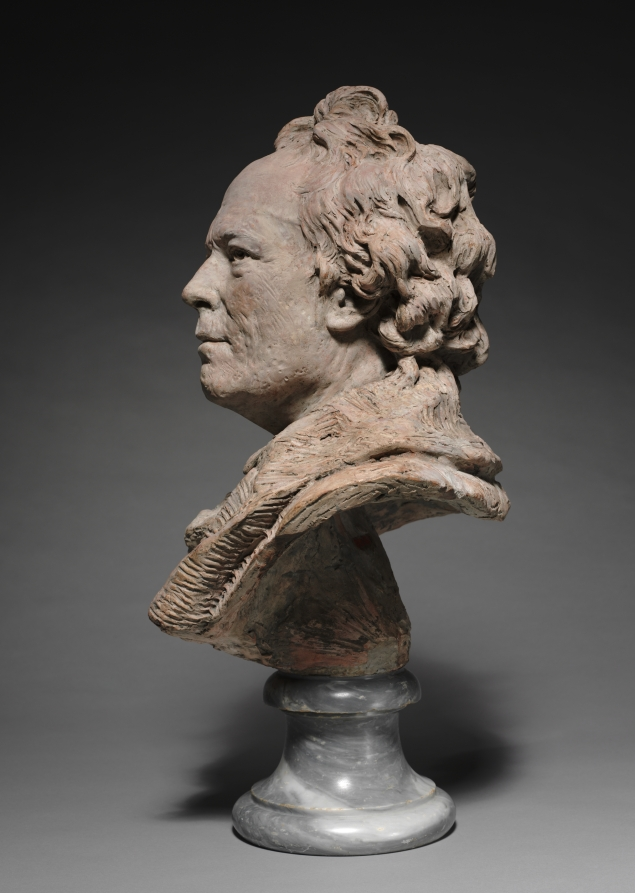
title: Portrait of Christoph Willibald Gluck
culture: France, 18th century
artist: Jean-Antoine Houdon (French, 1741–1828)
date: c. 1775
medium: terracotta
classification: Sculpture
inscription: inscribed in plaster fill in back at bottom: Houdon FT 177[4?]. Since this inscription was clearly added after the terracotta was fired, it cannot be considered a signature.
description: A well-known composer of the 1700s, Gluck reformed opera by bringing unprecedented simplicity and sincerity to his music and staging, qualities shared by Houdon’s bust. This portrait, by depicting Gluck’s pockmarked face, was perceived as a natural and truthful representation. Yet, he would never have appeared publicly with unkempt hair and an open collar, which constituted the standard for representing an artist.